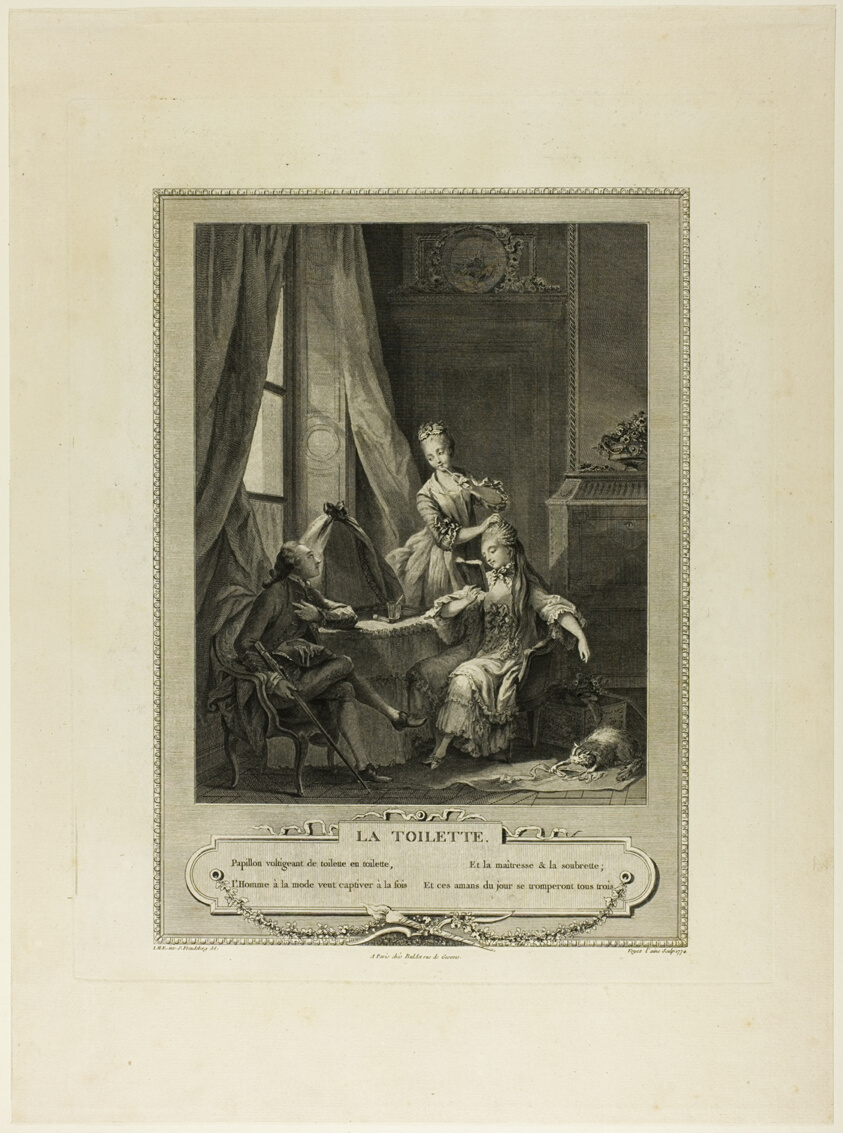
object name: Print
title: La Toilette, from Monument du Costume Physique et Moral de la fin du Dix-huitième siècle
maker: Nicolas Joseph Voyez (French, 1742-1806); after Sigmund Freudeberg (Swiss, 1745-1801); published by Laurent-François Prault (French 1712-1780)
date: 1774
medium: Engraving on paper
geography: France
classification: etching; print; prints and drawing